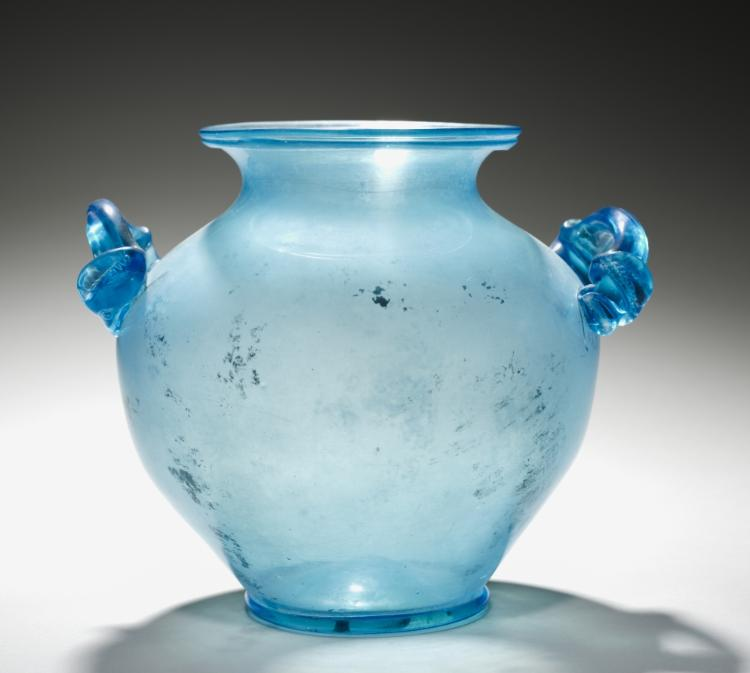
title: Cinerary Urn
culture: Italy, Roman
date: 1–200 CE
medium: glass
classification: Glass